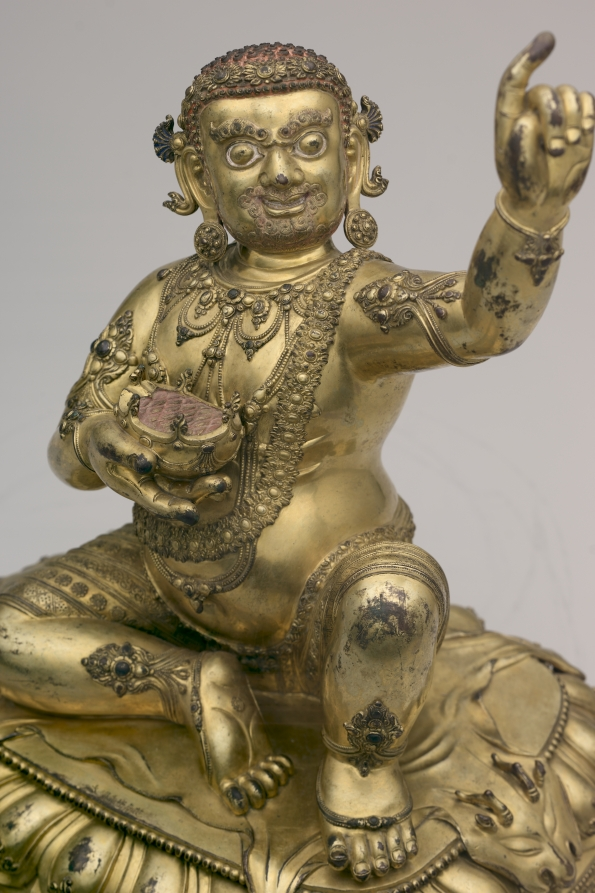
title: Virupa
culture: China, Ming dynasty (1368-1644), Yongle reign (1403-1424)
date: early 1400s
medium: Gilt bronze with silver, stones, and pigment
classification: Sculpture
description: Virupa is one of the great teachers in the history of tantric Buddhism. His posture references his ability to stop the sun; as an enlightened being, he can control phenomena of nature. As a tantric practitioner, he overturns ordinary assumptions about proper behavior, so he overeats, drinks large quantities of liquor, and waits for the king to pay his bill at the tavern. At the edge of the lotus pedestal is an inscription identifying the image as having been made in the imperial kilns of the third emperor of the Ming dynasty in China as a gift to a Tibetan monastic leader. While closely linked to Tibetan styles, the luxurious detailing, special gilding process, and the casting of the ornaments onto the body without use of inlay are specifically Chinese characteristics.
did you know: Virupa's clothing and jewelry are embellished with silver and stones, while pigments enhance his hair and eyes.